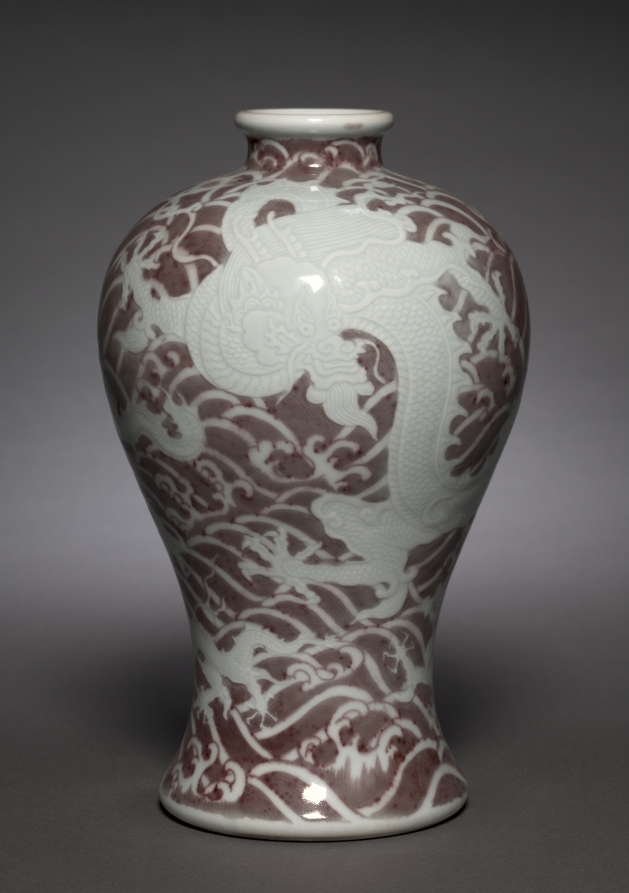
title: Meiping (Prunus) Vase with Dragons in Waves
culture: China, Jiangxi province, Jingdezhen kilns, Qing dynasty (1644-1911), Yongzheng mark and reign (1723-35)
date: 1723–35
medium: porcelain with incised and underglaze red decoration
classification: Ceramic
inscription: 大清雍正年制